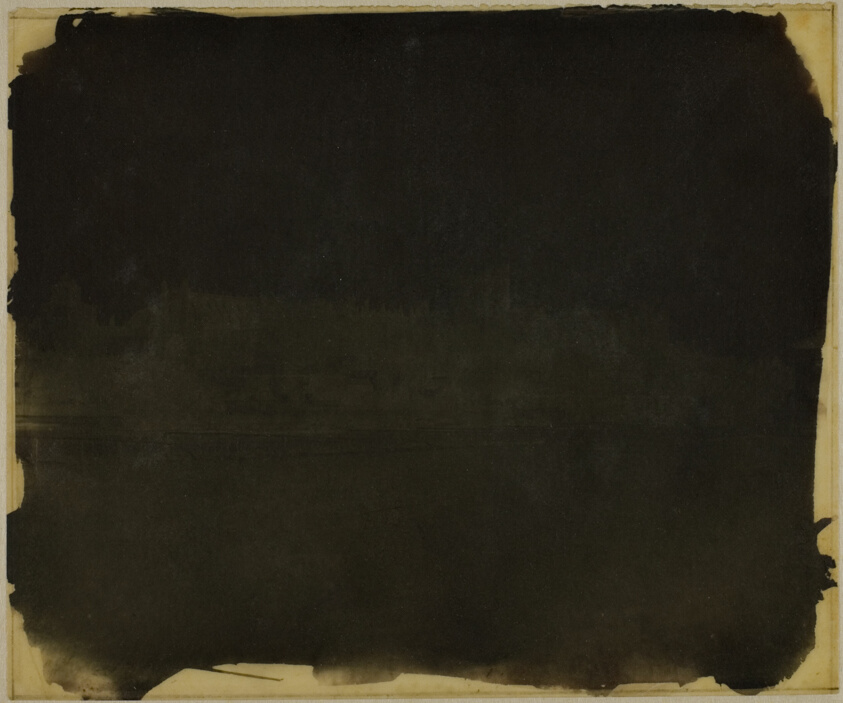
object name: Photograph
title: Windsor Castle From Across The River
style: 19th century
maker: William Henry Fox Talbot (English, 1800–1877)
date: c. 1842/46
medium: Waxed calotype paper negative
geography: England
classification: calotype negative; negative; negative/transparency; photography; photograph